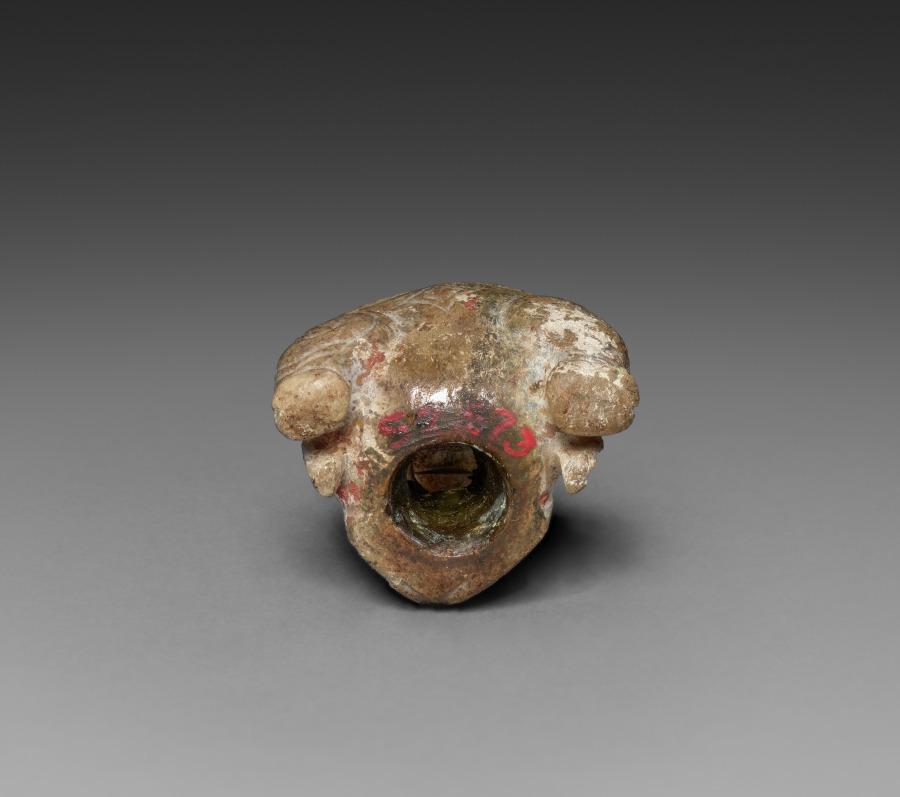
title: Feline Head with Bovine Horns and Elephant Trunk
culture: China, Shang dynasty (c. 1600–c. 1046 BCE)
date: 1300–1000 BCE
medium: jade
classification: Jade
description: This small jade was shaped into a fantastic, composite animal: a feline form with bovine horns and an elephant's trunk.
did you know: The mouth, the underside of the nose, and the tapering hole for attachment at the rear of the head were cut by drilling.